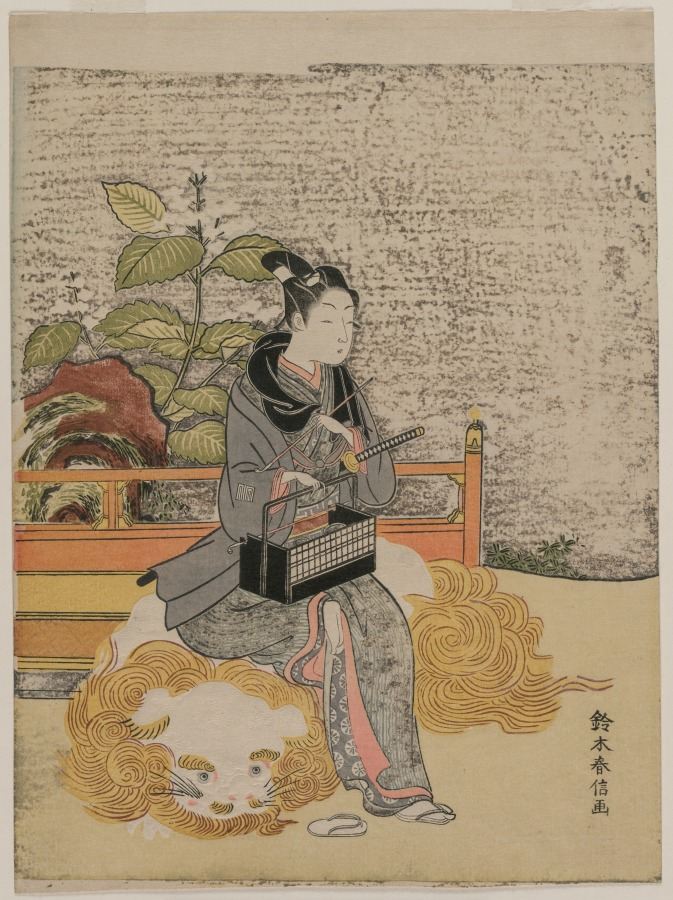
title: Youth as a Stand-in Monju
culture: Japan, Edo period (1615–1868)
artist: Suzuki Harunobu (Japanese, 1724–1770)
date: c. 1767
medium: color woodblock print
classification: Print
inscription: Signature: Suzuki Harunobu ga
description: In this image, a handsome young man replaces the Buddhist figure Monju, a bodhisattva—or enlightened being—often shown riding a lion. Monju symbolizes wisdom and customarily holds a sword and a sacred text atop a lotus flower. The youth here meditates instead on his tobacco kit and a long pipe. The print was once paired with another, showing a young woman replacing Fugen, a bodhisattva who rides an elephant.